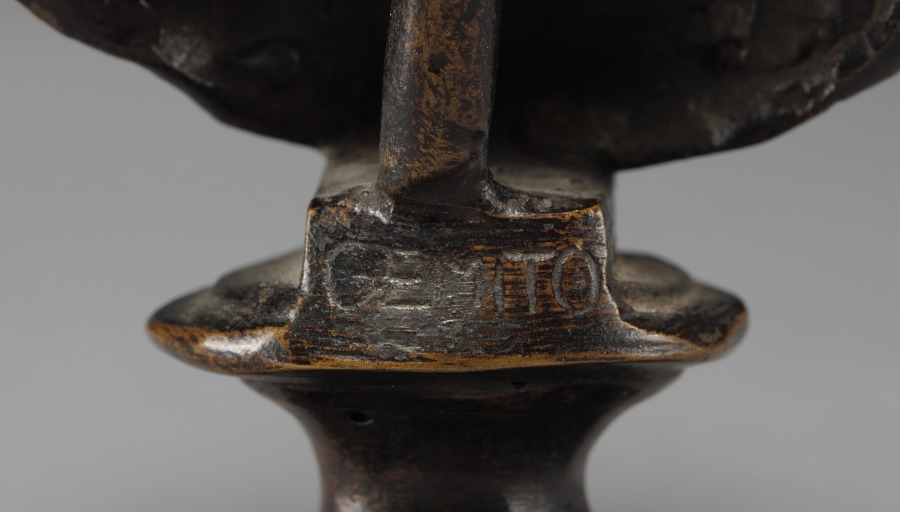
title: Head of a Man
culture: Italy, late 19th-early 20th century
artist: Vincenzo Gemito (Italian, 1852–1929)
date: c. 1875 – 1929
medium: bronze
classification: Sculpture